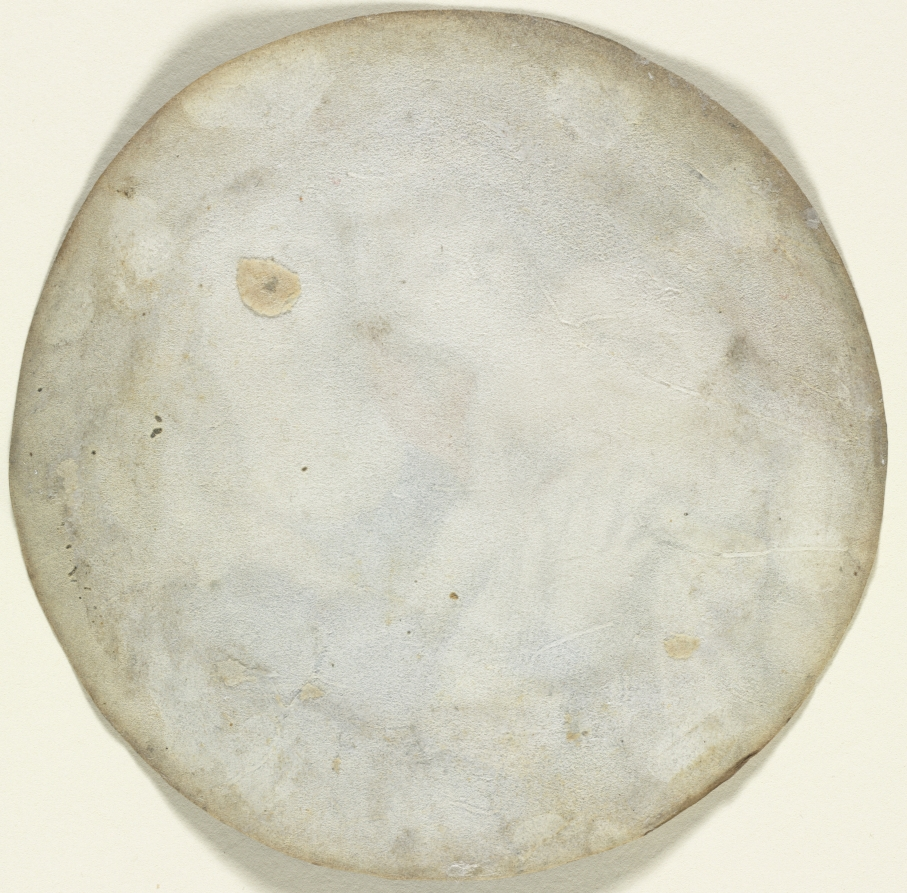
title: Virgin and Child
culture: England, 17th century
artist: Anna Maria Carew (British)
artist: after Anthony van Dyck (Flemish, 1599–1641)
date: c. 1662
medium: watercolor heightened with gum on vellum, with gold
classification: Portrait Miniature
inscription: signed at right center: "Maria Carew / fect"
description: Larger in size than most portrait miniatures, the Madonna and Child by Anna Maria Carew is a cabinet miniature, or a small work on vellum, enamel, or ivory that copies a full-scale oil painting. In this case the original painting was by Flemish artist Anthony van Dyck, and engraved by Paulus Pontius around 1630 shortly after it was painted. As a cabinet miniature, this work is somewhat unusual because of its religious subject and its simplicity. Cabinet miniatures tended instead to reproduce paintings of dramatic subjects and climactic moments in myths or religious stories. They could be hung on the wall or stored in elaborate and specially designed furniture, and they were often displayed in the smaller, more private rooms of a house.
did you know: King Charles II awarded Carew an annual pension to copy in miniature from the royal collection.